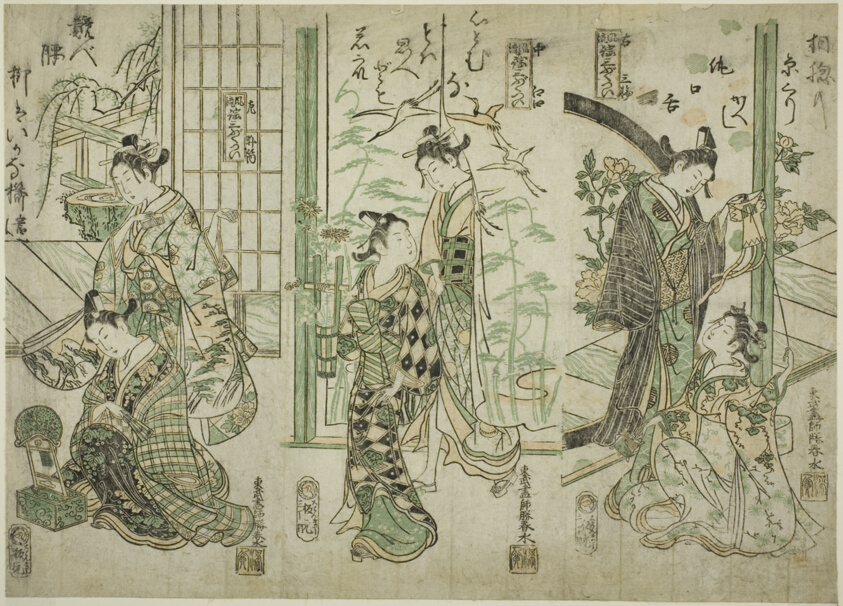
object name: Print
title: A Triptych of Fashionable No Plays (Furyu Utai Sambukutsui)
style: Japanese (culture or style)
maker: Miyagawa Shunsui; Japanese, active 1740s-early 1760s; Publisher: Tsuruya Kiemon of Ödemma-cho san-chome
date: c. late 1750s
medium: Color woodblock print; benizuri hosoban; triptych (uncut)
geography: Japan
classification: woodblock print; print; asian art